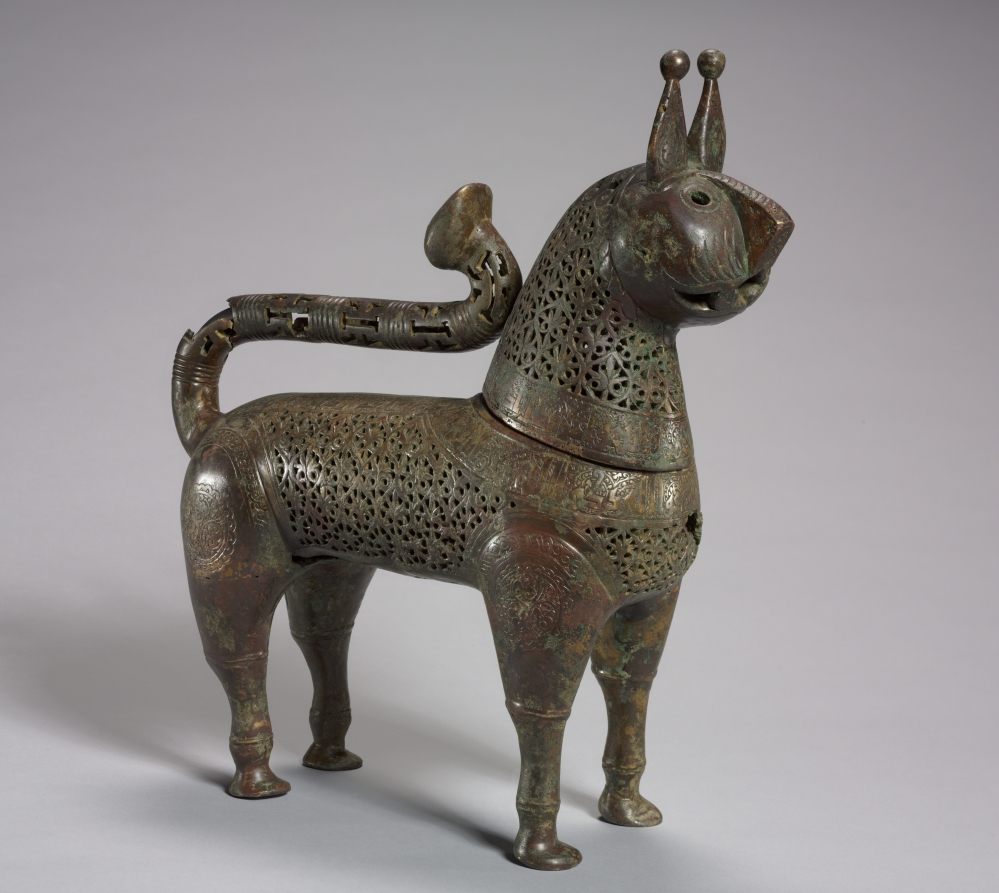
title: Feline Incense Burner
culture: Iran, Khurasan, Seljuq period of Iran (1037–1194)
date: 1150–1200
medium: Copper alloy, cast, engraved, chased, and pierced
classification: Metalwork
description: In Iran during the 1000s and 1100s, vessels in the shape of animals gained popularity, especially as incense burners. Felines were favored in Persian art and this piece may represent a caracal, a type of lynx. The head of the creature was cast separately and is removable to fill its body with hot coals and incense. Qur’anic verses on the neck and spine remind worshippers to set work aside, attend prayer, and then disperse to seek God’s bounty. The diffusion of perfumed smoke through the burner’s pierced palmette design may have served as a sensorial reminder of this teaching.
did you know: Arabic inscriptions in Kufic script against a background of scrolling arabesques run along the back and neck of the feline form.